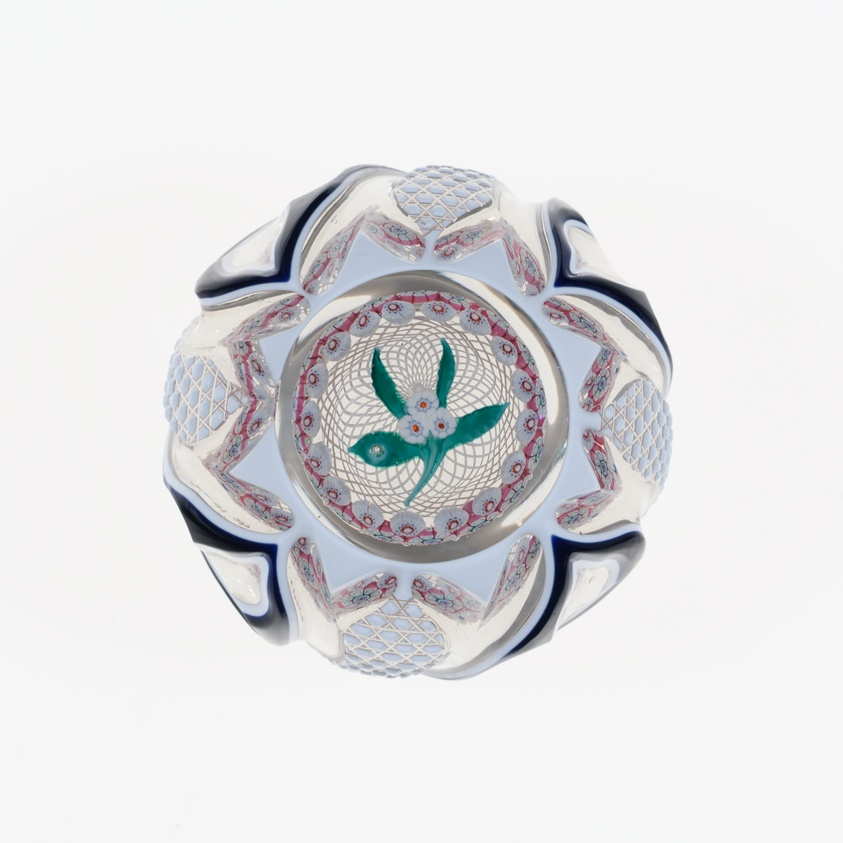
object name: Glass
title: Paperweight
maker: New England Glass Company (Cambridge, Massachusetts, 1818-1888)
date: late 19th century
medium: Glass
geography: United States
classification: paperweight; glass